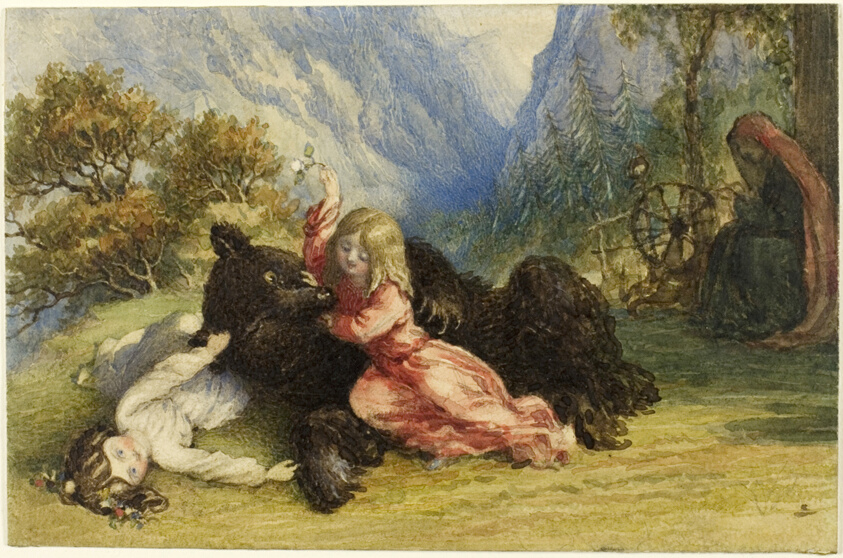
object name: Drawing and Watercolor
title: Snow White and Rose Red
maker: Richard Doyle (English, 1824-1883)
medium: Watercolor over graphite on ivory wove paper, laid down on card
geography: England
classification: watercolor; drawings (visual works); prints and drawing